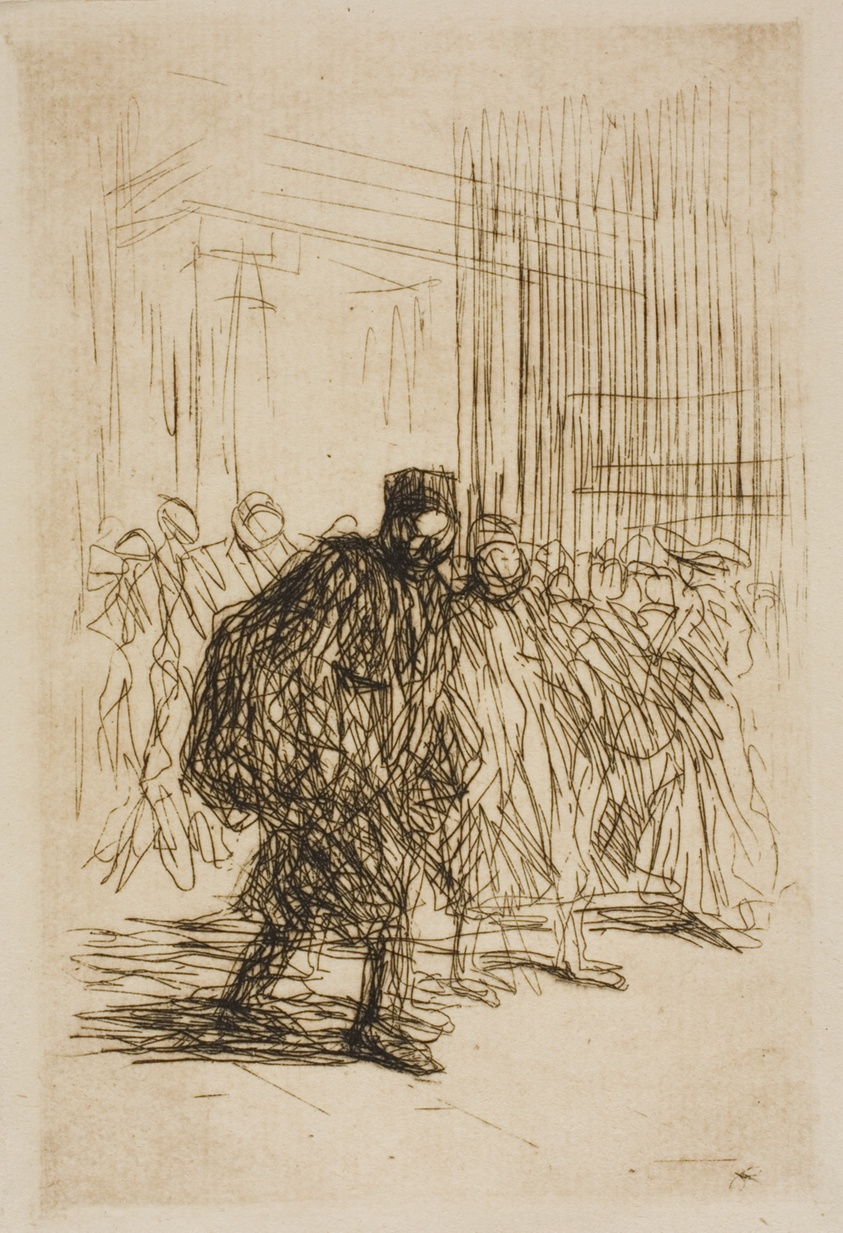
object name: Print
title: In the Corridors of the Court House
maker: Jean Louis Forain (French, 1852-1931)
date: December 1908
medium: Etching in dark brown on cream wove paper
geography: France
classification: etching; print; prints and drawing